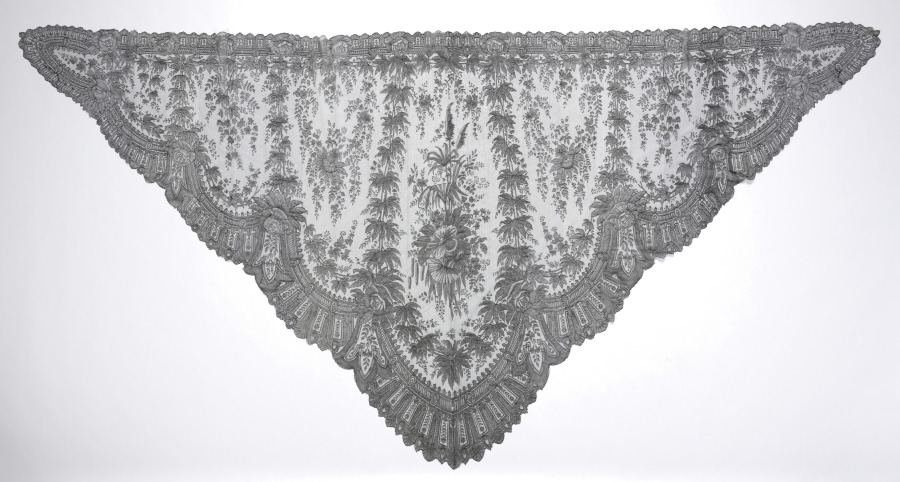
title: Lace Shawl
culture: France, Chantilly ?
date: 1840–60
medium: Silk: bobbin lace, Chantilly (blonde) lace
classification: Lace